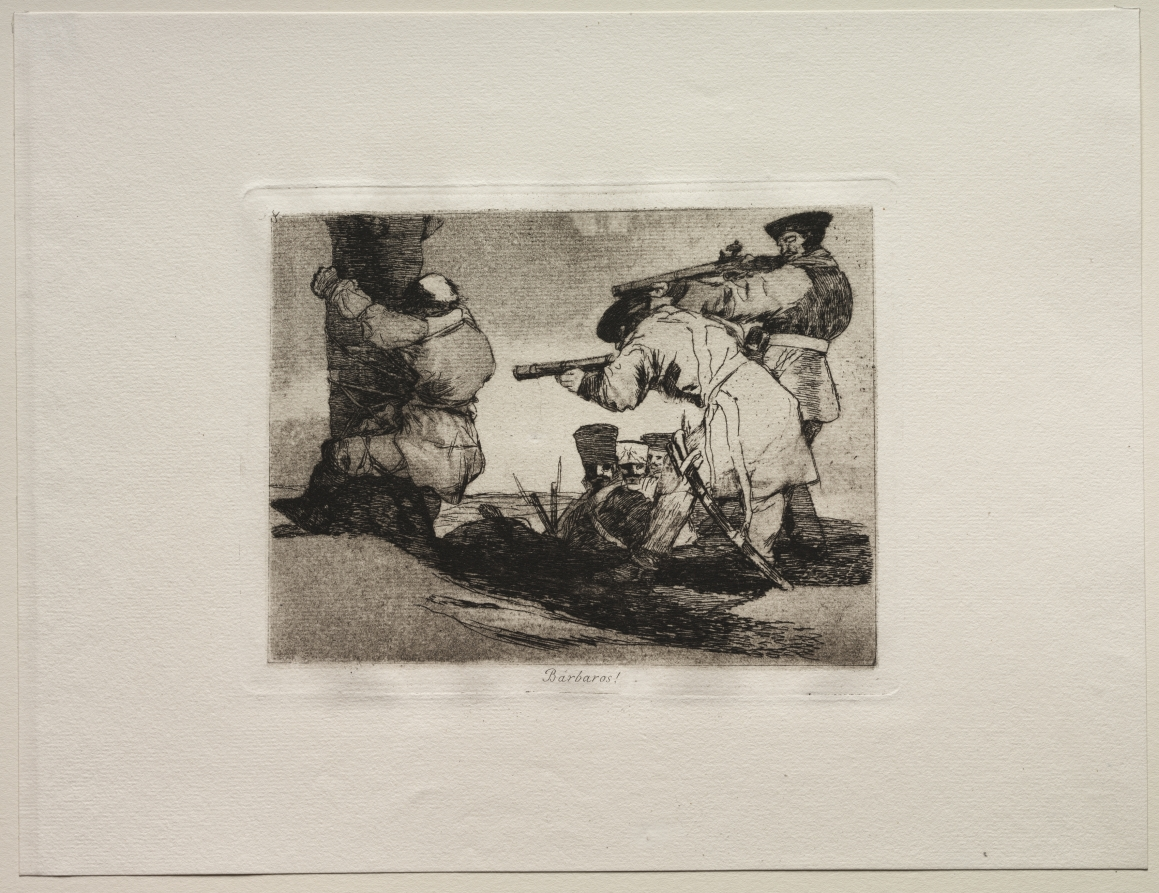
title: The Horrors of War: Barbarians!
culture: Spain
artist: Francisco de Goya (Spanish, 1746–1828)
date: 1810–20, published 1863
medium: etching and aquatint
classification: Print